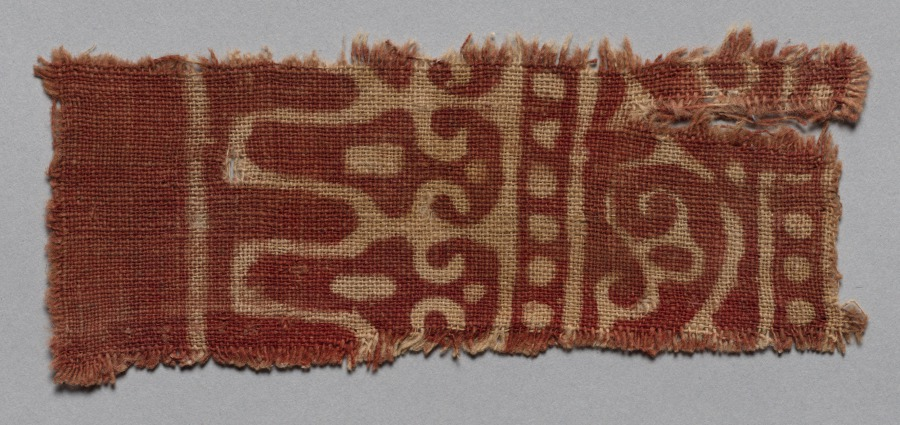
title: Fragment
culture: India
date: 1100s–1300s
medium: plain cloth, resist dyed; cotton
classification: Textile